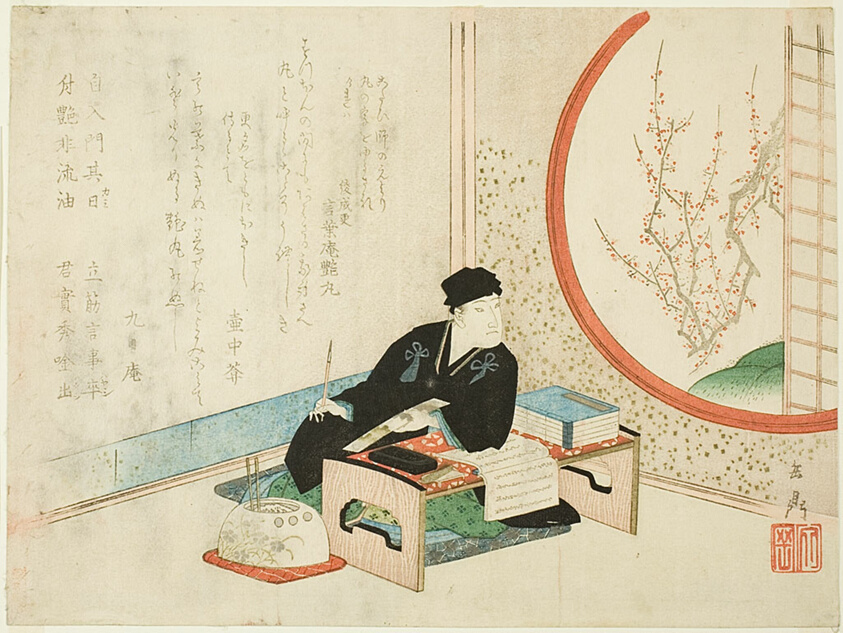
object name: Print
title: A Poet in the New Year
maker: Yashima Gakutei (Japanese, about 1786-1868)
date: late 1820s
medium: Color woodblock print; surimono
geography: Japan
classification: woodblock print; print; asian art